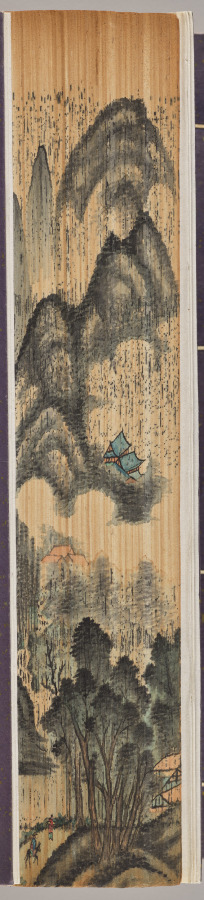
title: Yu-hai (The Ocean of Jade)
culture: China, Ming dynasty (1368–1644)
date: 1368–1644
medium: woodblock-printed book with painted edges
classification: Bound Volume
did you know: When each book is rolled to form a cylinder, a landscape appears on the edges, painted in ink and washes of color.